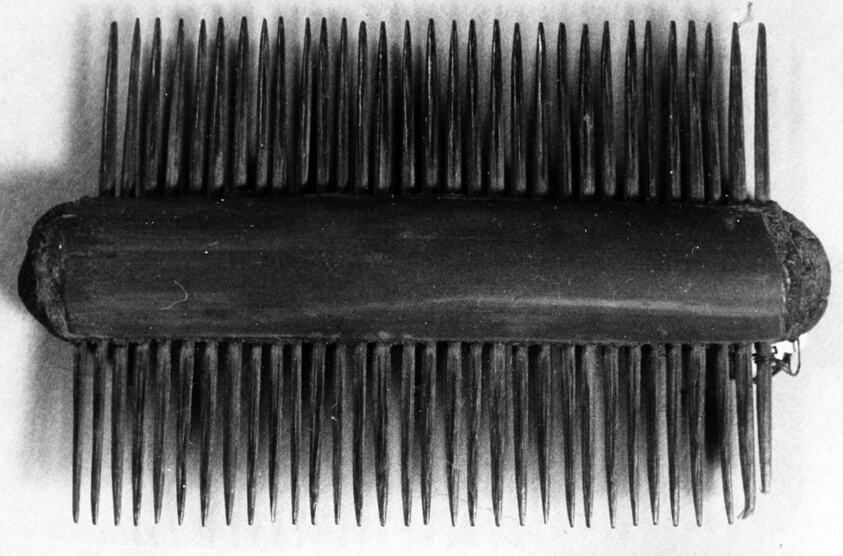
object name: Textile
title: Weaving Comb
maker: Peru, Possibly central coast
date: A.D. 1000/1476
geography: Peru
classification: textile; textile working equipment; weaving; accessories (object genre)